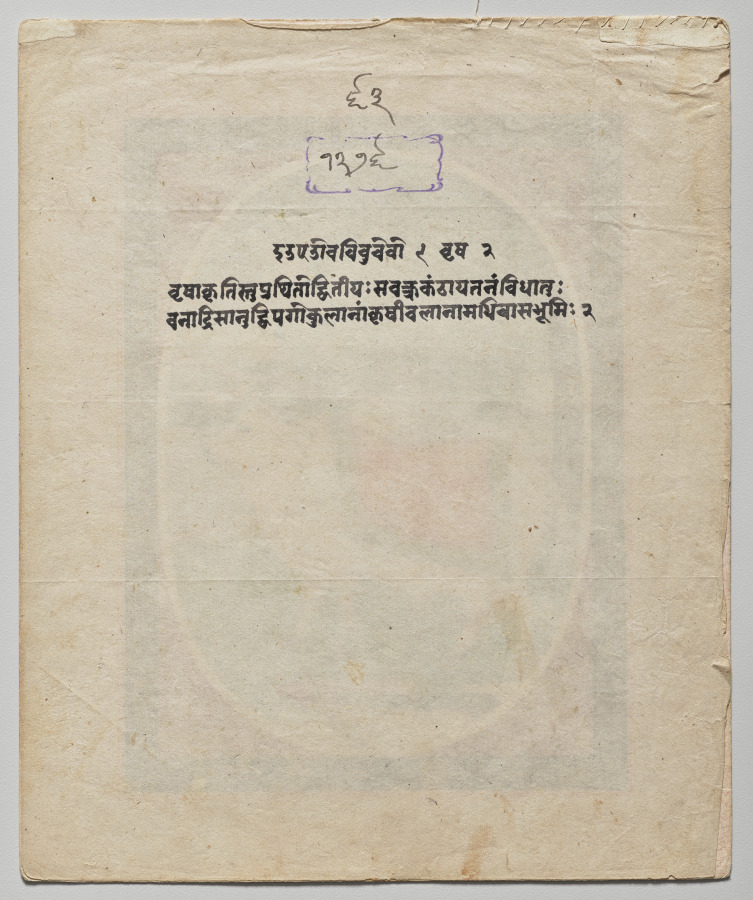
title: Taurus, from a "Mandi Astrology Series"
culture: Northern India, Pahari kingdoms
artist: attributed to Sanju (Indian, active late 1700s–early 1800s)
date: c. 1810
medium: Gum tempera and gold on paper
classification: Painting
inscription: The attached flysheet has a number, verse, and the stamp of the Mandi Royal Library, filled with the number 1296. The series number is 63, with the verse is number 2.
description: Standing for the astrological sign Taurus, the large-scale bull fills the space like a graceful icon behind a much smaller herd of cows. Pure white in color and in perfect profile, he has been adorned with a string of bells, a jeweled diadem, and decorative tips on his horns. A fine textile with gold leafy arabesque patterns sets him apart from oxen, dairy cows, and even the elephants in the distant background.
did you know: The oval format derives from the popularity of British cameos at the Mughal court.